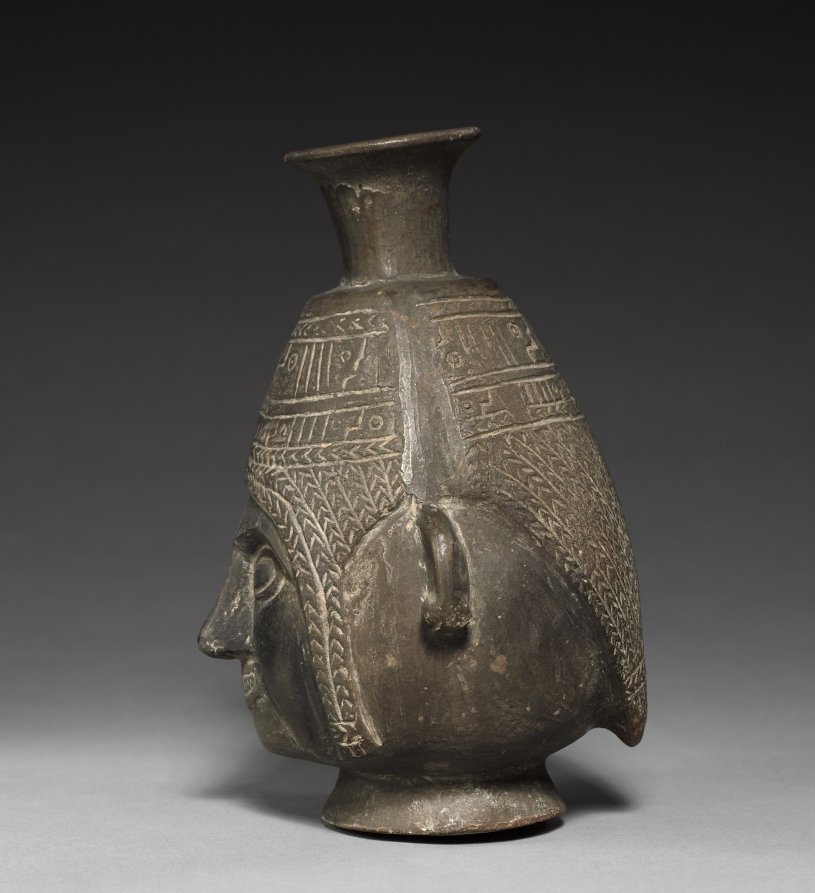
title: Bottle Vase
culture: Peru, Chimú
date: c. 1400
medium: black ware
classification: Ceramic